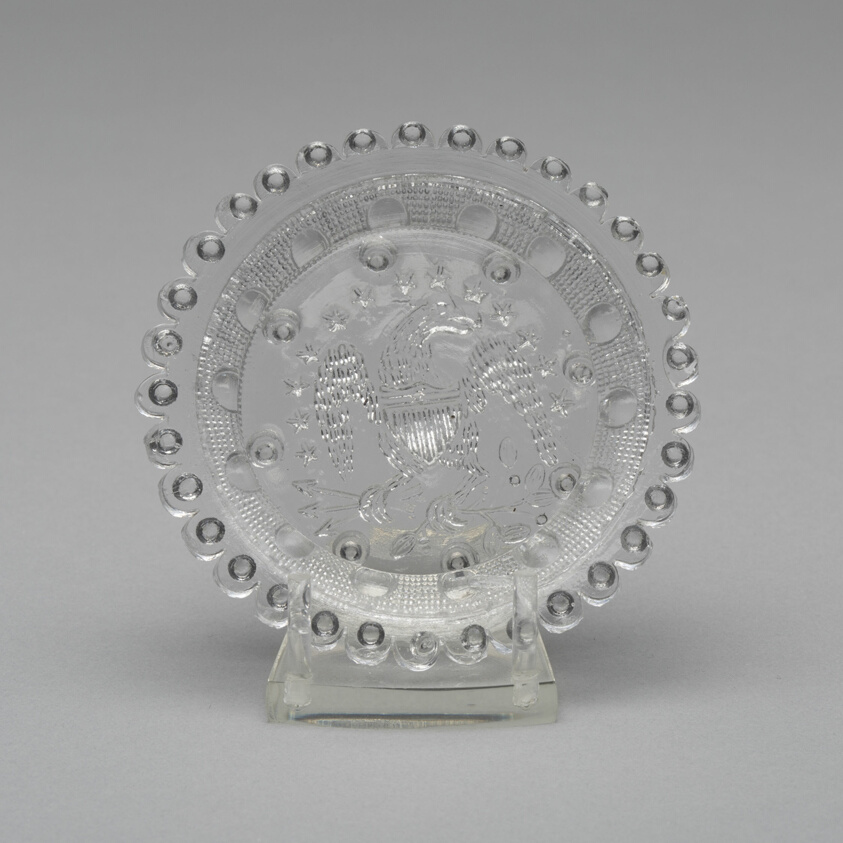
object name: Glass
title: Cup plate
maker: Artist unknown (American, 19th century); Pittsburgh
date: 1830–35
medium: Pressed glass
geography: Pittsburgh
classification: plate (general, dish); glass; american decorative arts; american arts; decorative arts